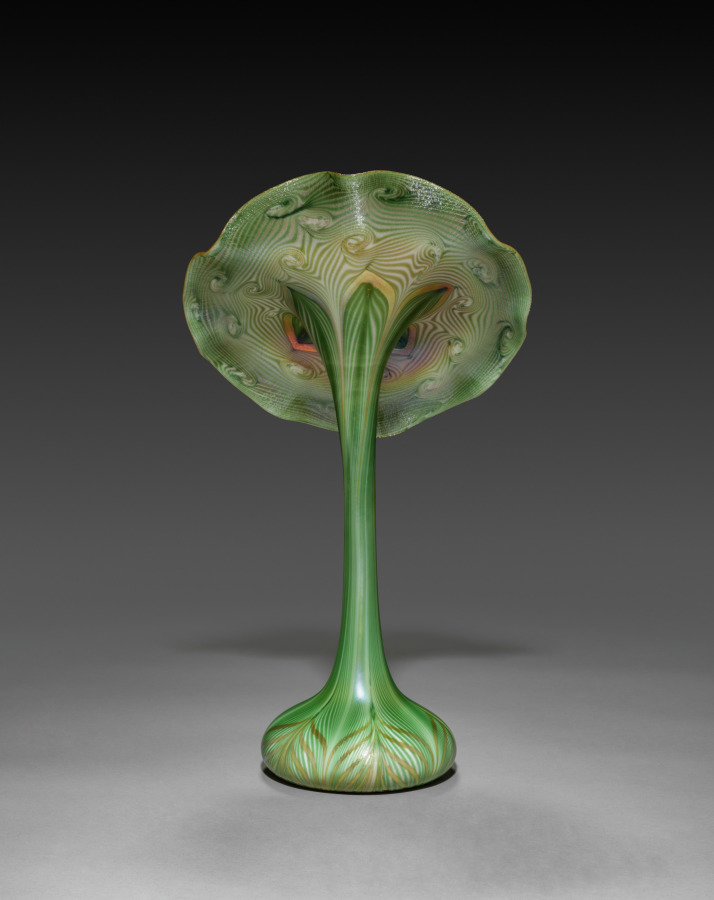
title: Jack-in-the-Pulpit Vase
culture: America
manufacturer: Quezal Art Glass and Decorating Company (American, 1901–1924)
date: c. 1900–1920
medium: blown glass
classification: Glass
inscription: engraved on underside: Quezal/-O-/440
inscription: affixed to underside: remnant of an original paper label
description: The Quezal Art Glass and Decorating Company was begun by former employees of Louis Comfort Tiffany as a rival operation in 1902. With its expressive form and brilliant golden iridescence, this vase represents the finest work produced by the Queens, New York, company in the Art Nouveau style.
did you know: The Quezal Art Glass and Decorating Company was named after a rare breed of South American bird, the quetzal, known for its colorful iridescent plumage.